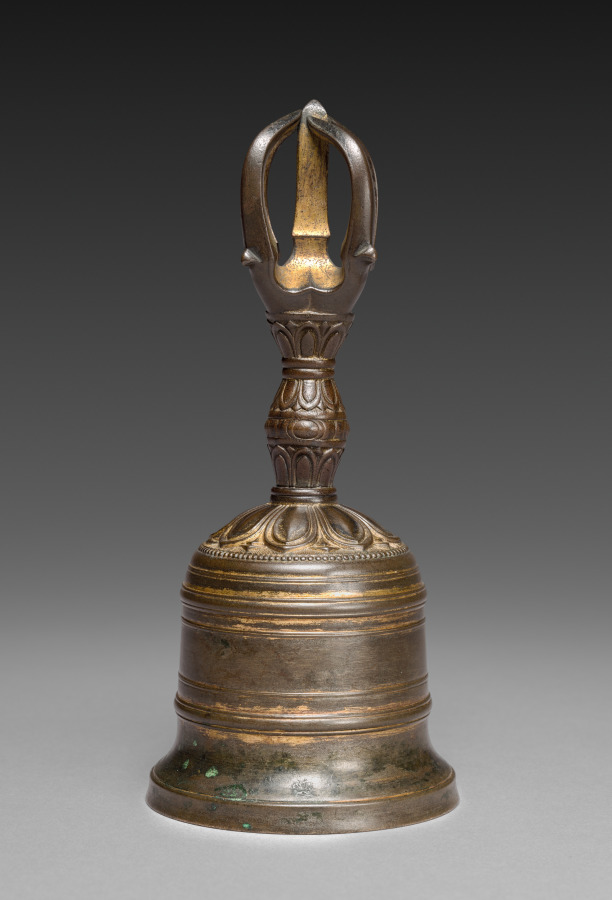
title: Five-pronged Vajra Bell (Gokorei)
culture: Japan, Kamakura period (1185–1333)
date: early 1300s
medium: gilt bronze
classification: Metalwork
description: The five prongs of this bell symbolize the Buddhist “Five Perfections”—generosity, morality, patience, perseverance, and concentration. The mouth of the bell symbolizes the “Sixth Perfection” of wisdom. The bell was used in Japanese Esoteric Buddhist rituals along with vajra pestles, or kongōsho.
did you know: Vajras are symbolic weapons, representing the properties of a diamond (indestructibility) and a thunderbolt (irresistible force), still used in Buddhist ceremonies today.